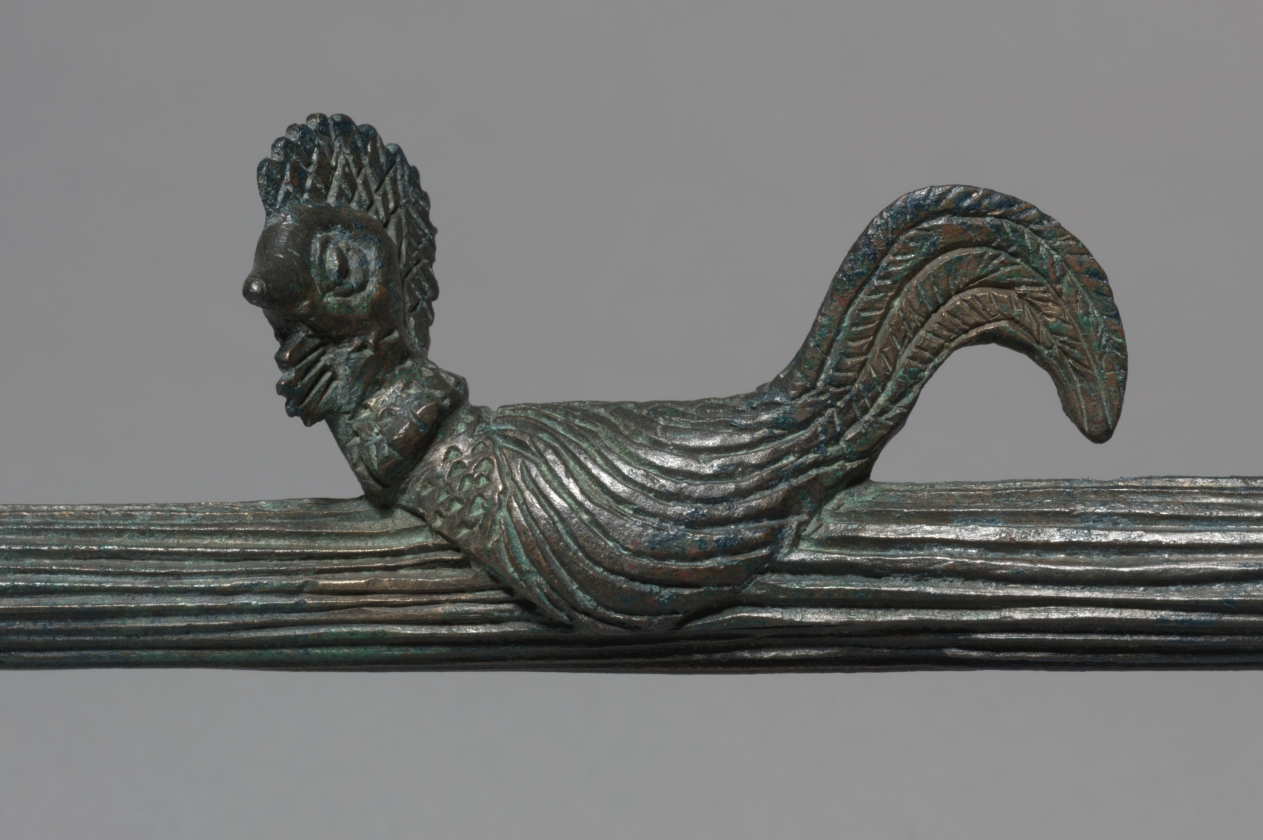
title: Incense Burner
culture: Etruscan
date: 100s BCE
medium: bronze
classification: Metalwork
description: Both elaborate and functional, the Etruscan thymiaterion, or incense burner, typically comprises at least three main parts—tripod stand, shaft, and, at the top, a shallow bowl for incense. Often, a figural support is incorporated, here in the form of a youthful male nude, perhaps the wine god Dionysos. Below him, the tripod stand features cloven hoofs, while above him a spotted cat or panther climbs toward a rooster or other crested bird. Holes in each corner of the square upper plate likely held additional animals or other ornaments.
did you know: The circular depression on the top of this object likely held incense.